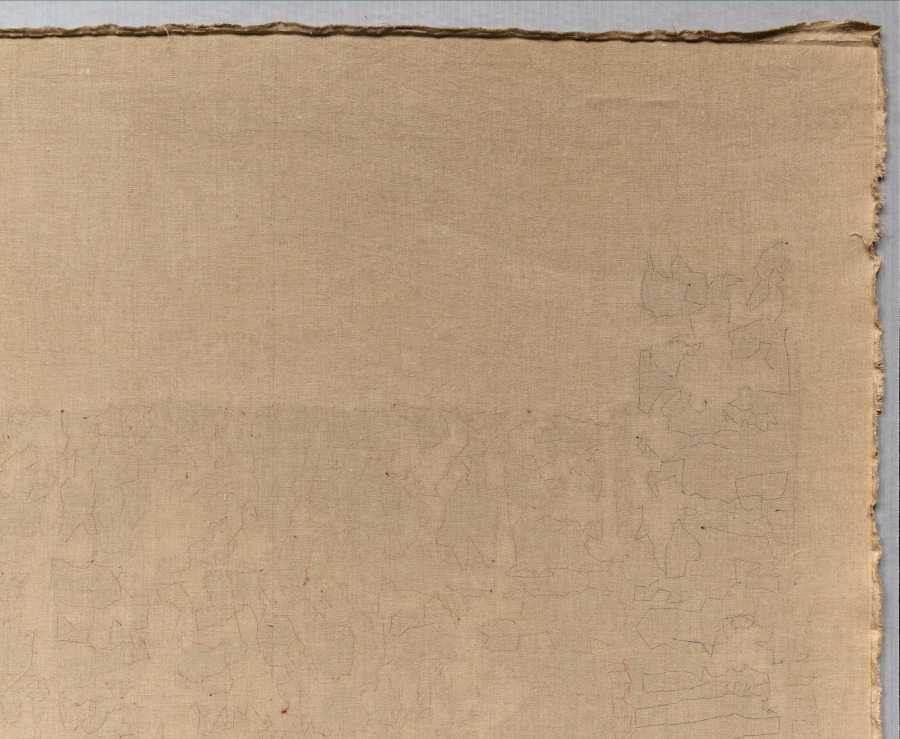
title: Fragment of a Large Hanging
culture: Egypt, Antinoë, Byzantine period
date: 500s CE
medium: tapestry weave (with plain tabby borders): wool and linen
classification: Textile